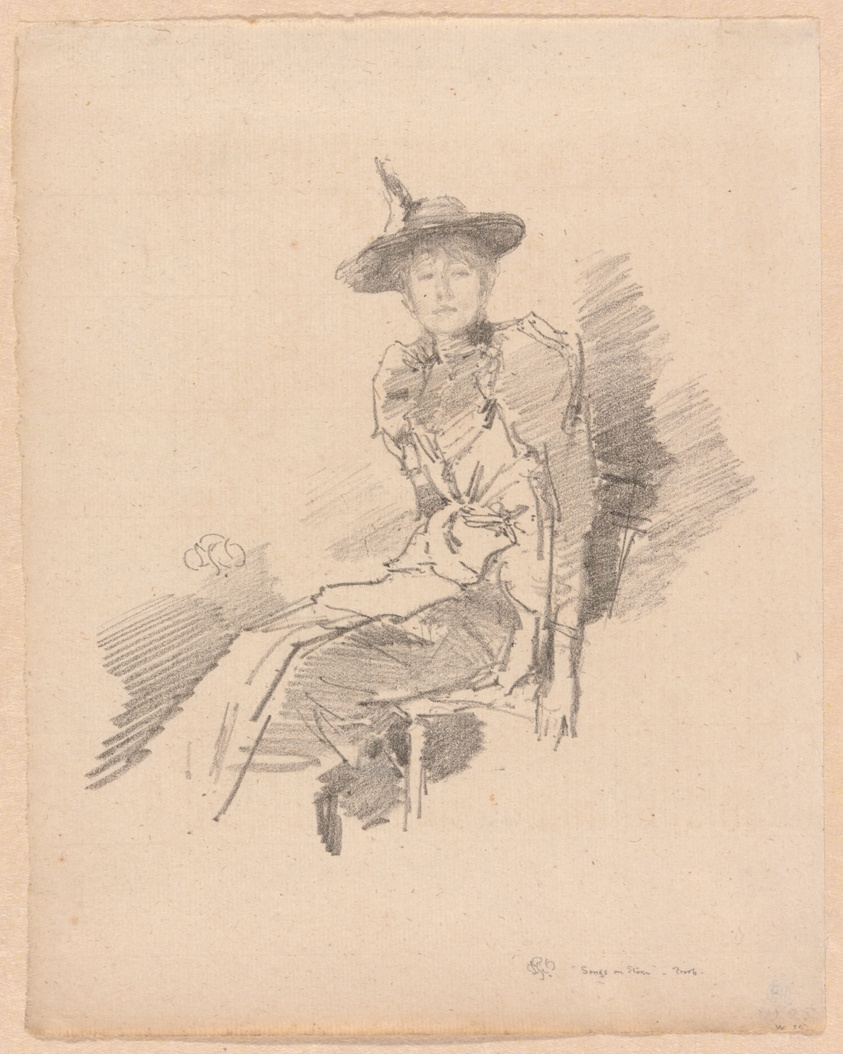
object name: Print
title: The Winged Hat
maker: James McNeill Whistler (American, 1834-1903)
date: 1890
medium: Transfer lithograph in black, with scraping, on cream laid paper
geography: United States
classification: transfer lithograph; lithograph; print; prints and drawing; paper